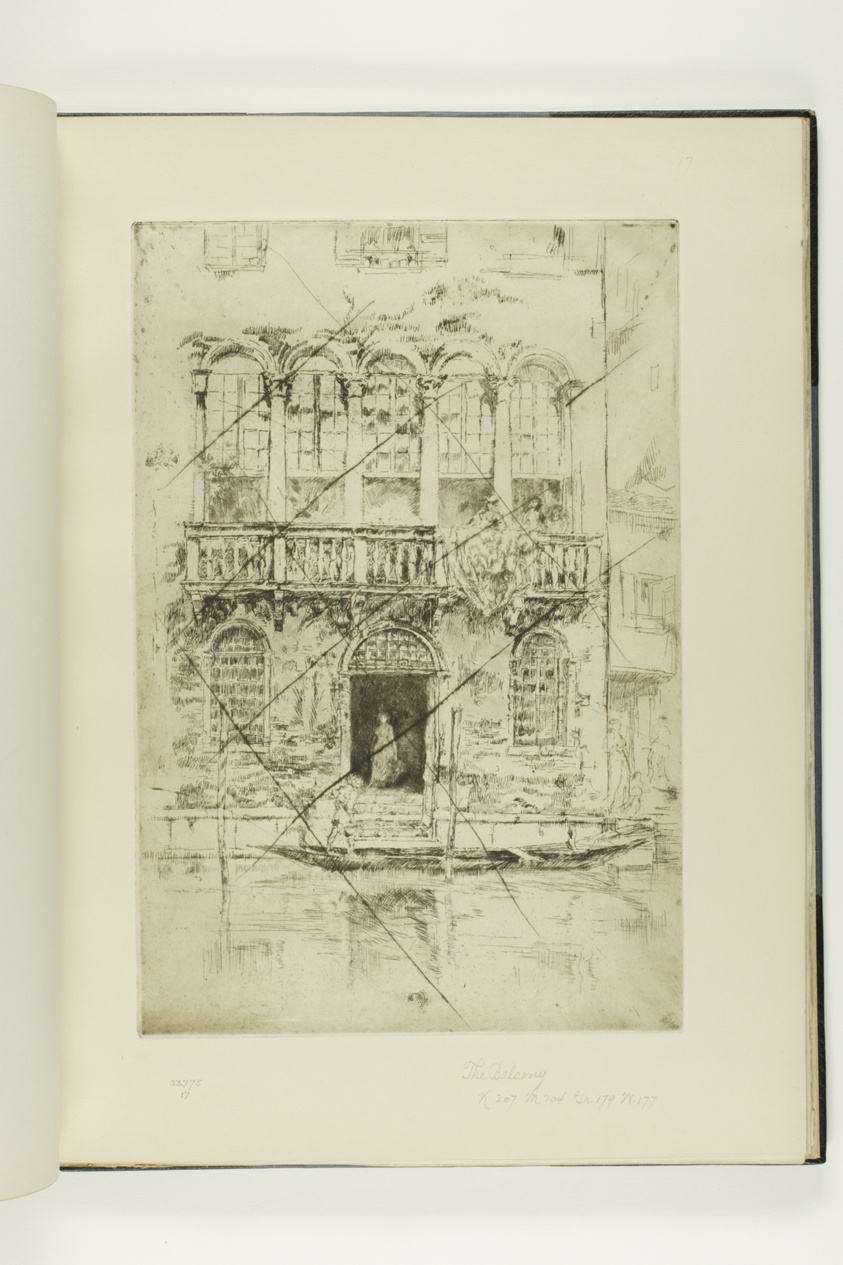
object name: Print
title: The Balcony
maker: James McNeill Whistler (American, 1834-1903)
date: 1879/80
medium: Etching and drypoint with foul biting, with drypoint cancellation, in black ink on ivory laid paper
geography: United States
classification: etching; print; prints and drawing; foul biting; drypoint; book; paper